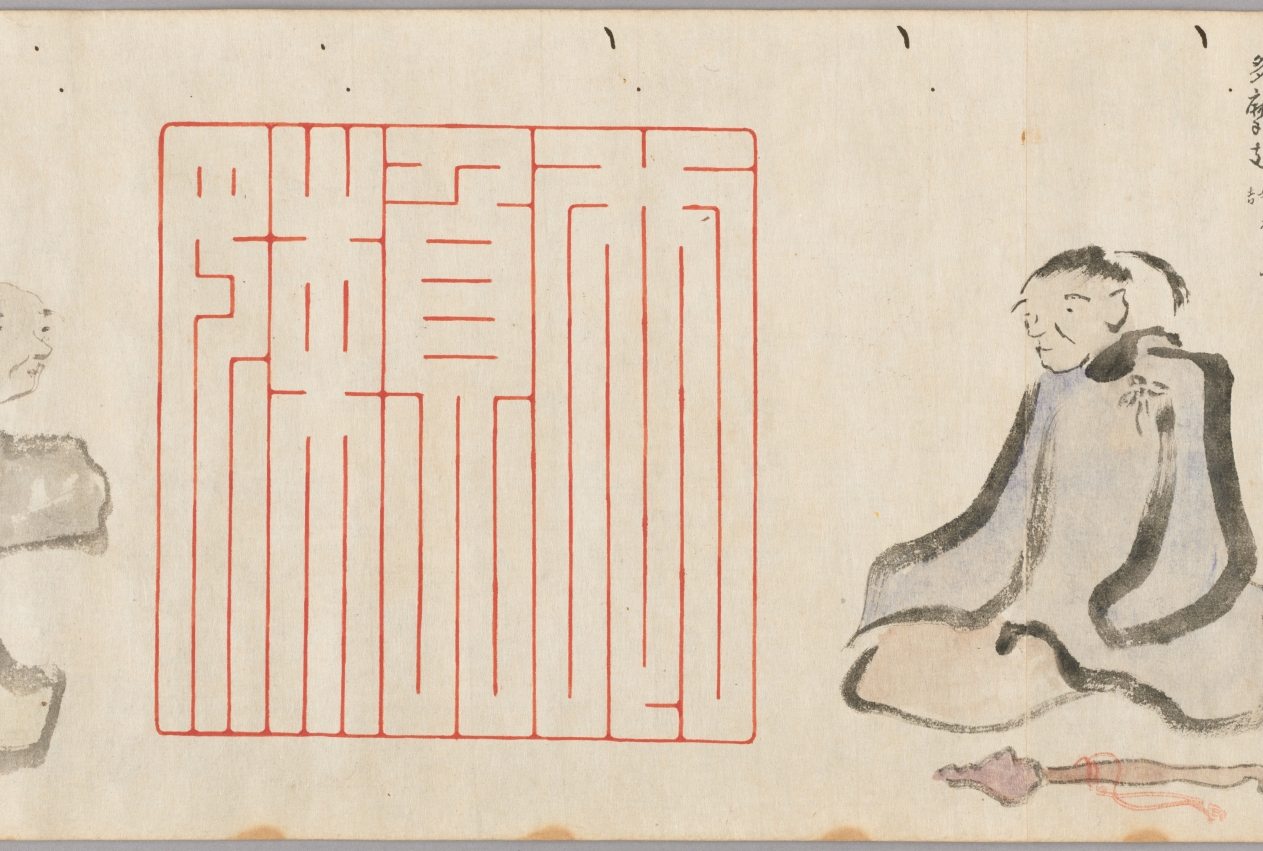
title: Chinese Seals and Poets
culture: Japan, Edo period (1615–1868)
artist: Hosokawa Rinkoku (Japanese, 1779–1843)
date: 1842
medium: handscroll; ink and color on paper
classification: Painting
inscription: Eight seal impressions are painted in red and alternate with sketchily painted figures. Artist's colophon at end of scroll.